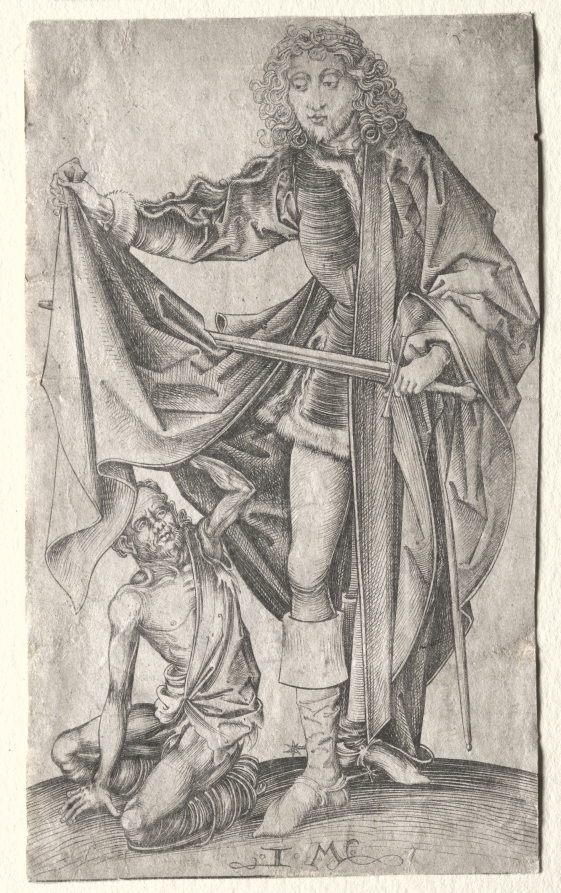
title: St. Martin Dividing His Cloak for a Beggar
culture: Germany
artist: Israhel van Meckenem (German, c. 1440–1503)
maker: after Martin Schongauer (German, c. 1450–1491)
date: c. 1485–90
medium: engraving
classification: Print